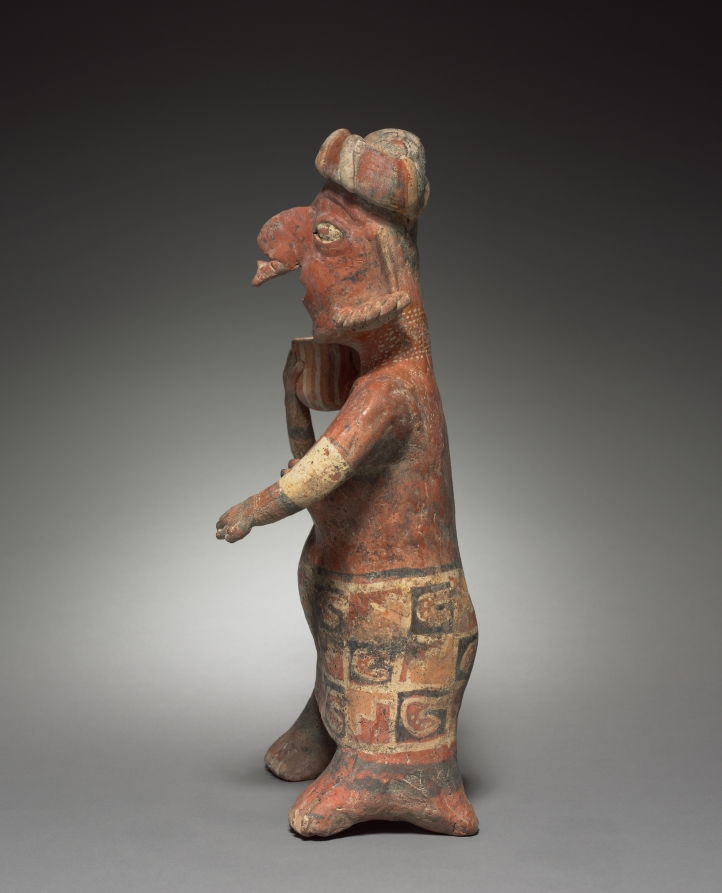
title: Standing Female Figure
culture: Mexico, Nayarit, Ixtlan del Rio style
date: c. 100 BCE–300 CE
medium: earthenware with colored slips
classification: Sculpture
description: Nagarit ceramic sculputres, like those of Colima, were manufactured for burial with the dead. The popular male-female couples may be portraits of the individuals with whom they were buried. This female figure, dressed in a colorful skirt and hat, has painted or tattooed patterns on her torso and face. Jewelry adorns her face, ears, and nose. The vessel on her shoulder symbolizes her domestic duties.